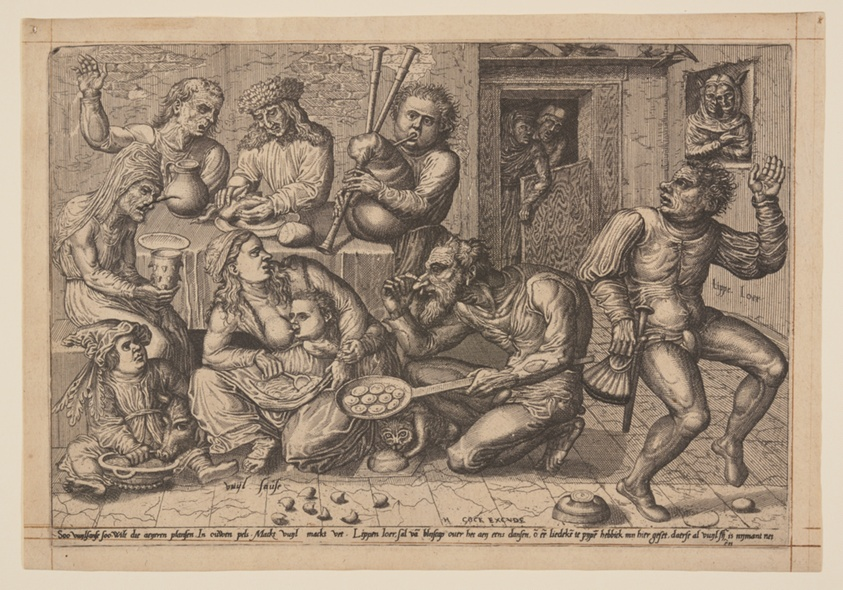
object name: Print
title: Vuyl Sause (Dirty Sauce)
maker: Unknown Artist; after Jan Verbeeck (Flemish, c. 1520-c. 1569)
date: c. 1559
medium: Etching on ivory laid paper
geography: Flanders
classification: print; paper; prints and drawing; etching